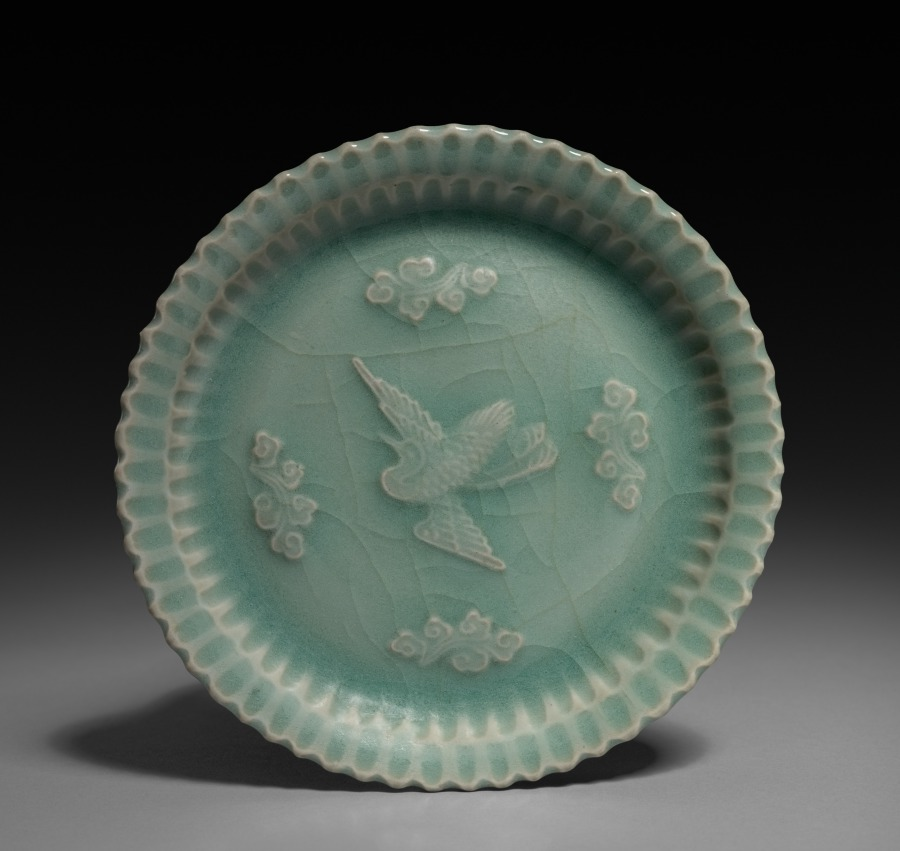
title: Dish with Flying Crane and Clouds in Relief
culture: China, Zhejiang province, Yuan dynasty (1271-1368)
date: 1300s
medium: Glazed porcelain with molded decoration, Longquan ware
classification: Ceramic